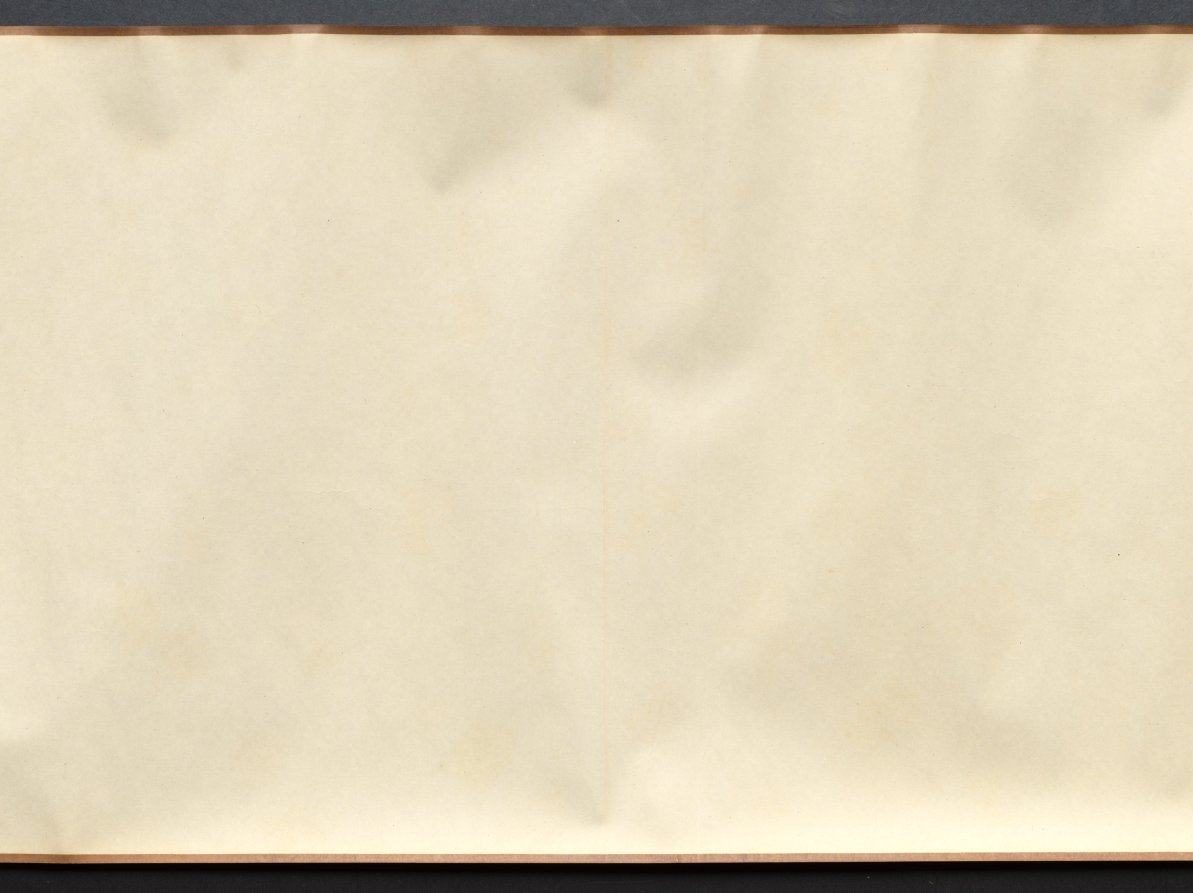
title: Returning to the Village in a Rainstorm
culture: China, Ming dynasty (1368–1644)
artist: Xie Shichen (Chinese, 1487–after 1567)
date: 1530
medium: Handscroll; ink and light color on silk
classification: Painting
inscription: 風雨歸村圖 嘉靖庚寅秋日樗仙謝時臣. [印] 謝時臣印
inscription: 3 additional seals unidentified.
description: This scroll depicts a wind- and rainswept landscape with figures in the countryside struggling against a late summer monsoon rainstorm. Such weather was familiar to residents of the lower Yangzi delta. Xie Shichen spent most of his life in the Suzhou area. Details of his career are scant, but his surviving works suggest that he made his living as a professional painter. This painting conveys drama and anecdotal observations, characteristic of Zhe school paintings, such as the one by Lü Wenying, CMA 1970.76.